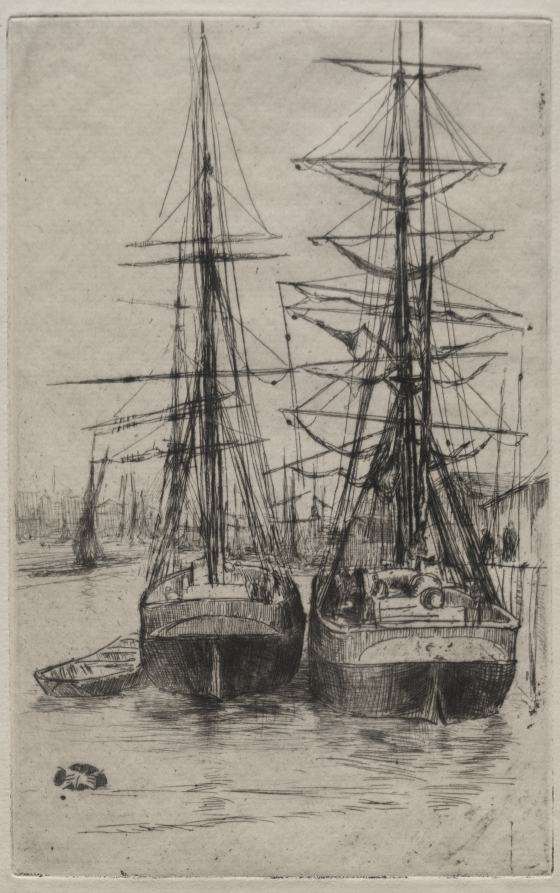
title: The Two Ships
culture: America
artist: James McNeill Whistler (American, 1834–1903)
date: 1875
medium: etching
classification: Print